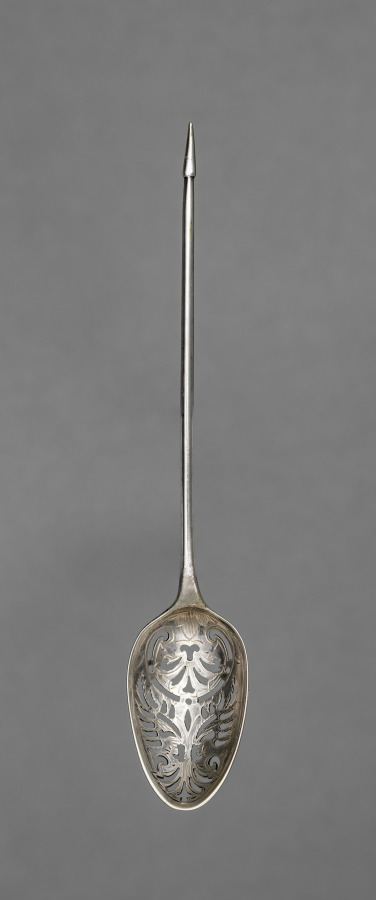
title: Strainer Spoon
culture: America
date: 18th Century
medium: silver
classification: Silver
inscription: engraved: "S.P" in block letters on back of bowl.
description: The bowl of this spoon was used to remove the unwanted debris from punch, while the spike at the other end of the handle could spear a slice of lemon.